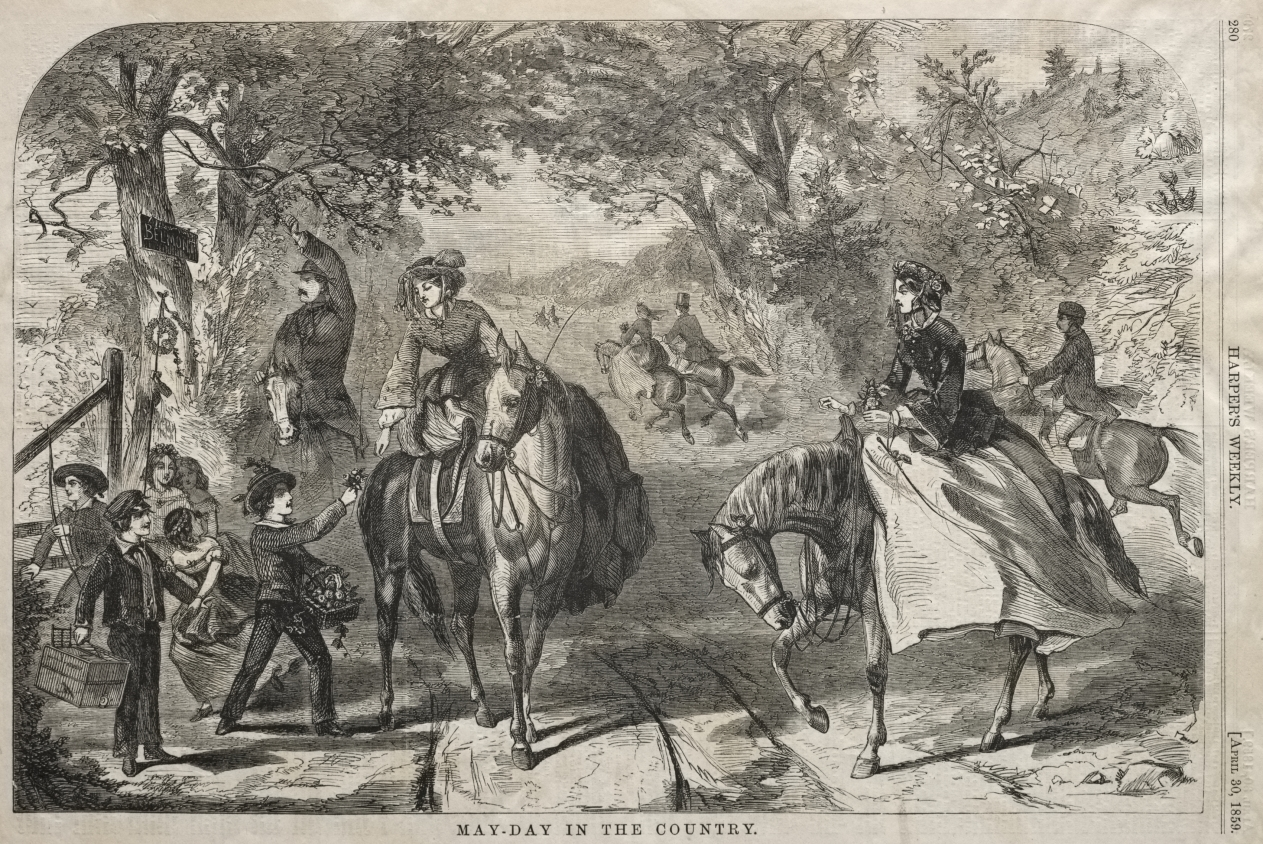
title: May Day in the Country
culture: America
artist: Winslow Homer (American, 1836–1910)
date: 1859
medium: wood engraving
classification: Print